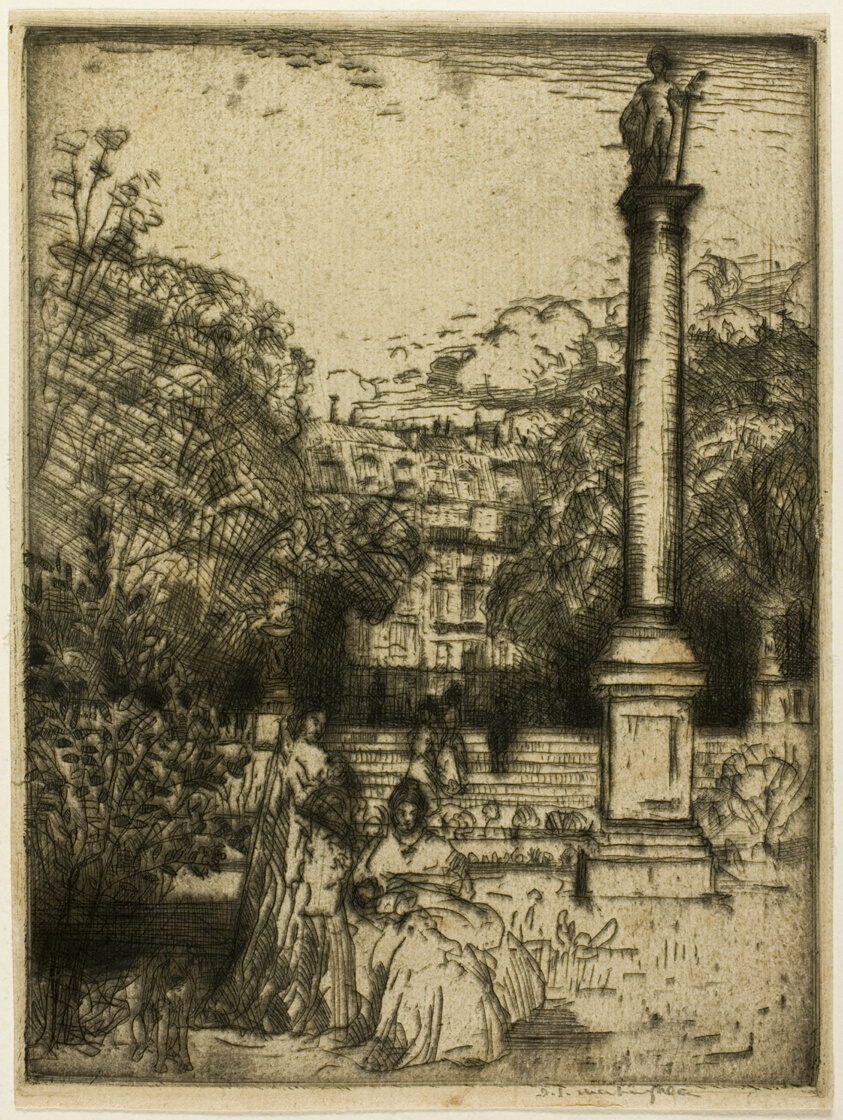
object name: Print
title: Luxembourg Column, Paris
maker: Donald Shaw MacLaughlan (American, born Canada, 1876-1938)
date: 1900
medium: Etching in black on cream wove paper, tipped onto cream card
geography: United States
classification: etching; print; prints and drawing